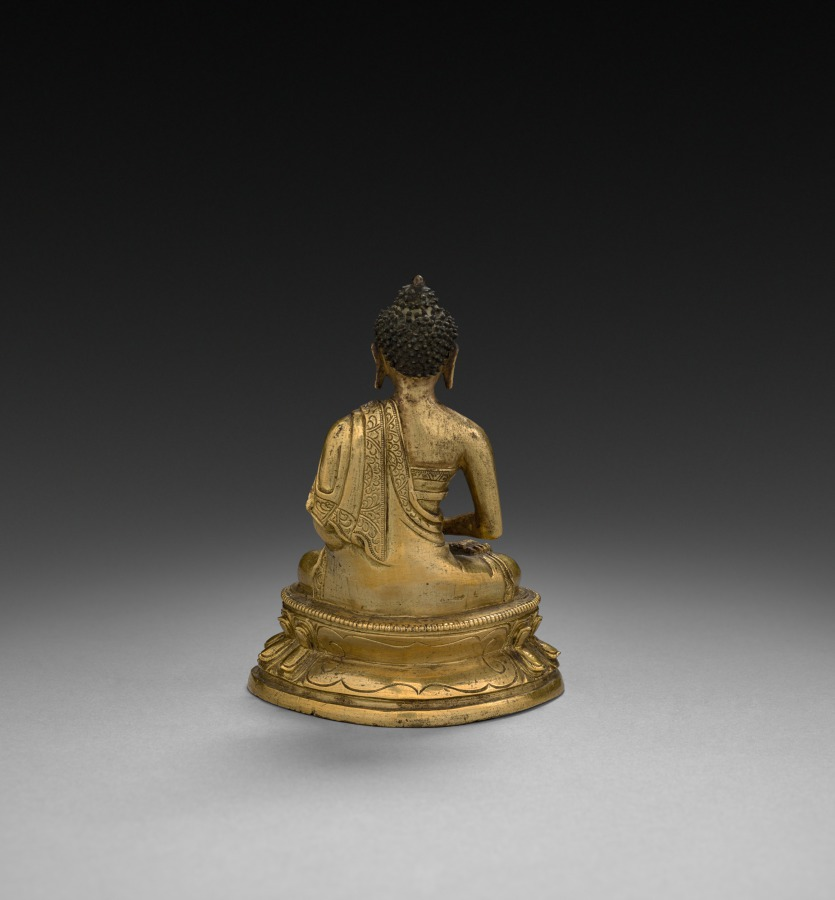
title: Seated Buddha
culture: China, Ming dynasty (1368–1644)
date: 1500s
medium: gilt bronze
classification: Sculpture